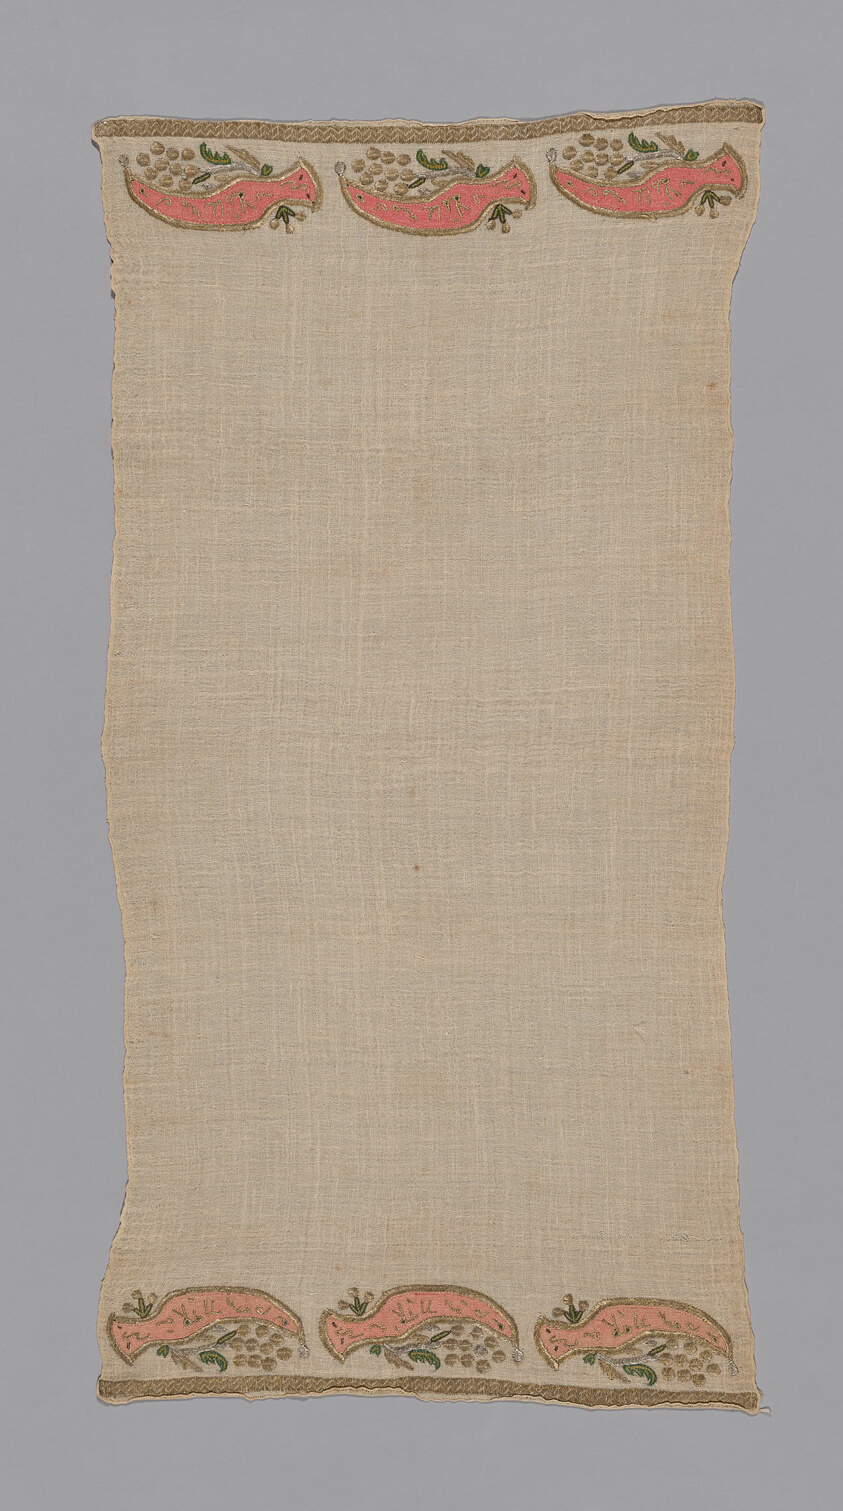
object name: Textile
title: Towel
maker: Turkey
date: 19th century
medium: Embroidered in dagger motif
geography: Turkey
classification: textile; needlework (visual works); weaving